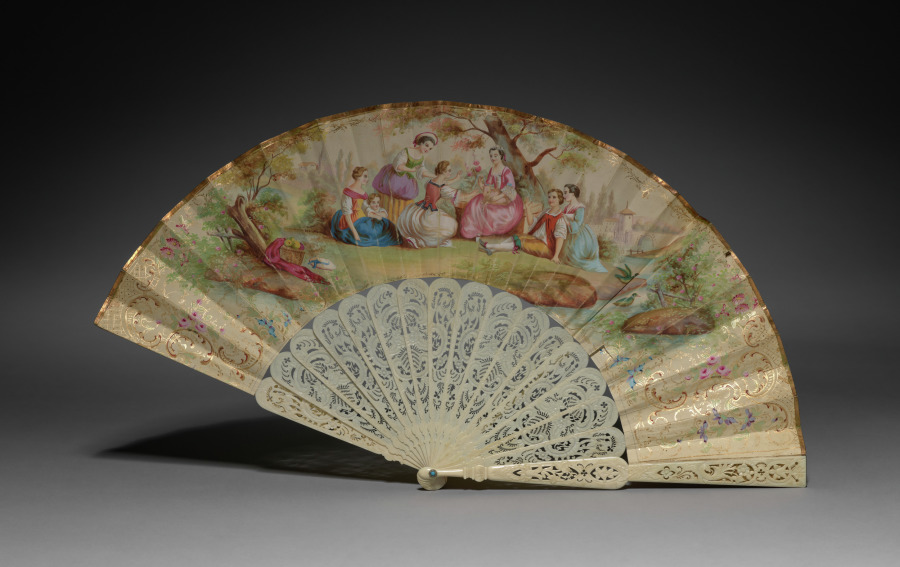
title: Fan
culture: Europe, mid-19th century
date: mid 1800s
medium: ivory with gilding, painted and gilt paper, painted silk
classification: Miscellaneous